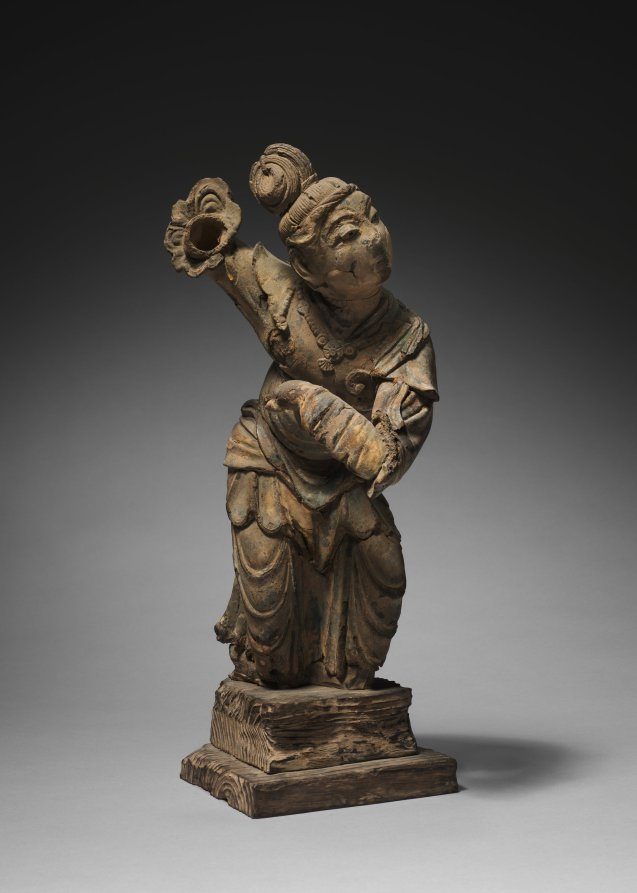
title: Dancing Apsaras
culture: China, late Tang dynasty (618–907) to Five dynasties (907–960)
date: 900s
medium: dry lacquer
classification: Sculpture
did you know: The sculpture was made from a rare technique involving alternate layers of cloth and lacquer, modeled on an armature or around a removable clay core.